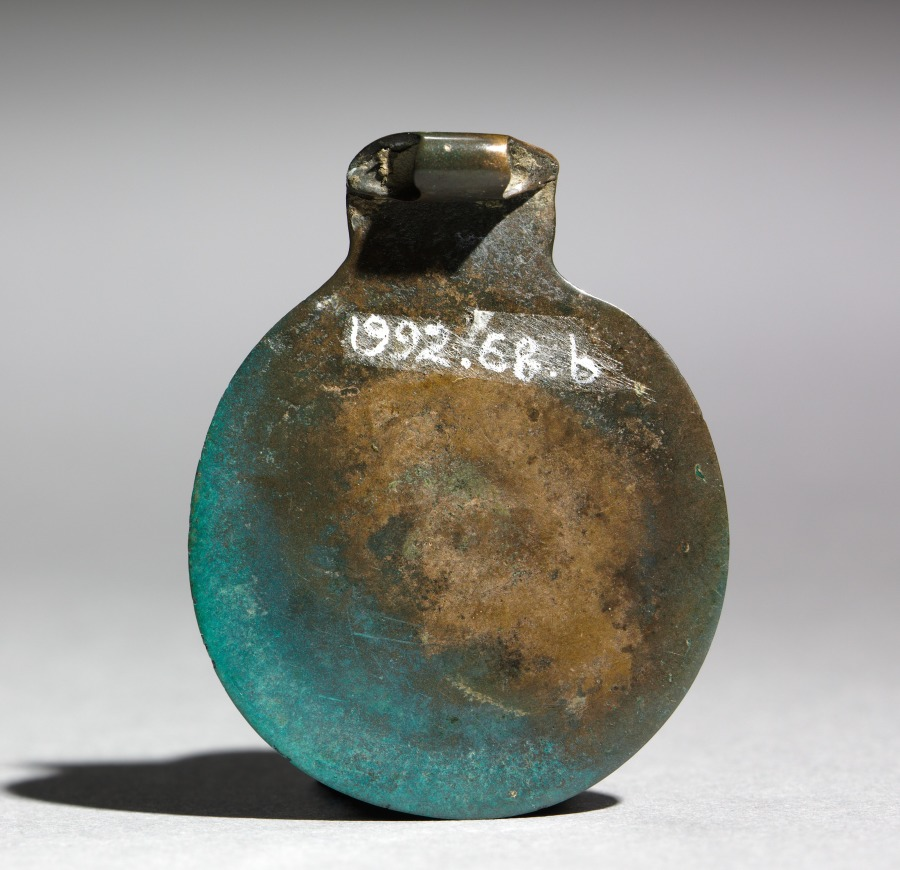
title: Elements from a Necklace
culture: possibly Hungary, Bronze Age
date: c. 1400–1300 BCE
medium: bronze, cast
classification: Jewelry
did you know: The cast bronze necklace pendants are partially oxidized, revealing a green patina.